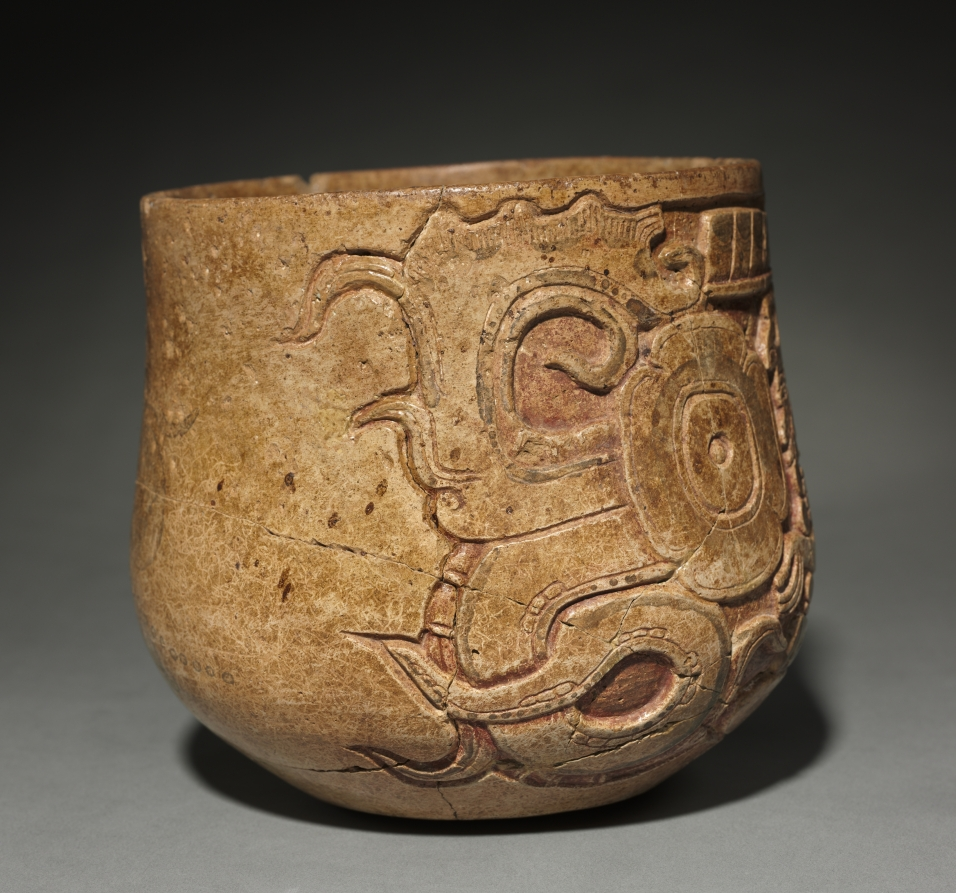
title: Carvel Vessel with an Underworld Diety (God L)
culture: Mexico, Yucatán Peninsula, Maya (Chocholá) style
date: 600–900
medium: earthenware, slip, pigment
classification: Ceramic